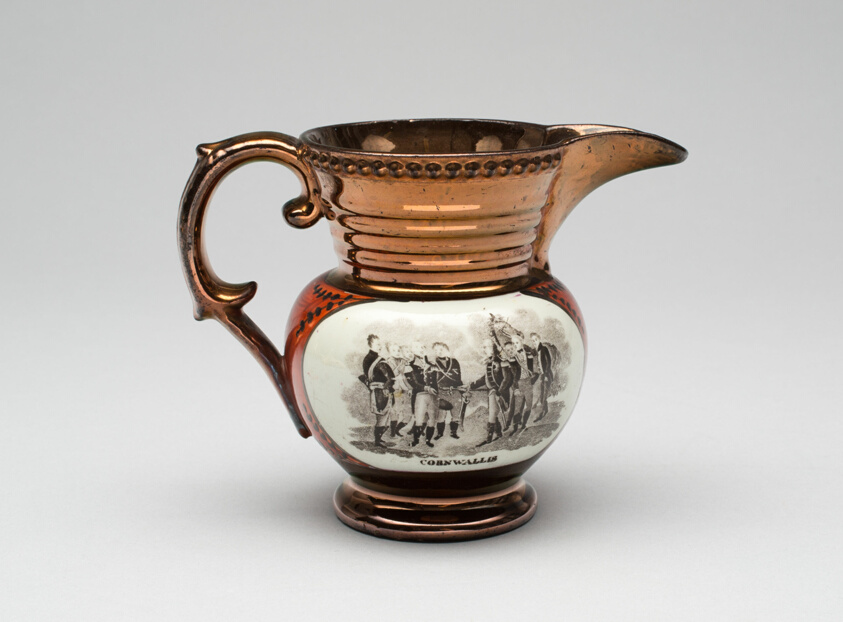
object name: Decorative Arts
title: Creamer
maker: English for the American market; Staffordshire, England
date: 1825–30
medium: Earthenware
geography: England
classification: creamer; earthenware; american decorative arts; ceramics; decorative arts